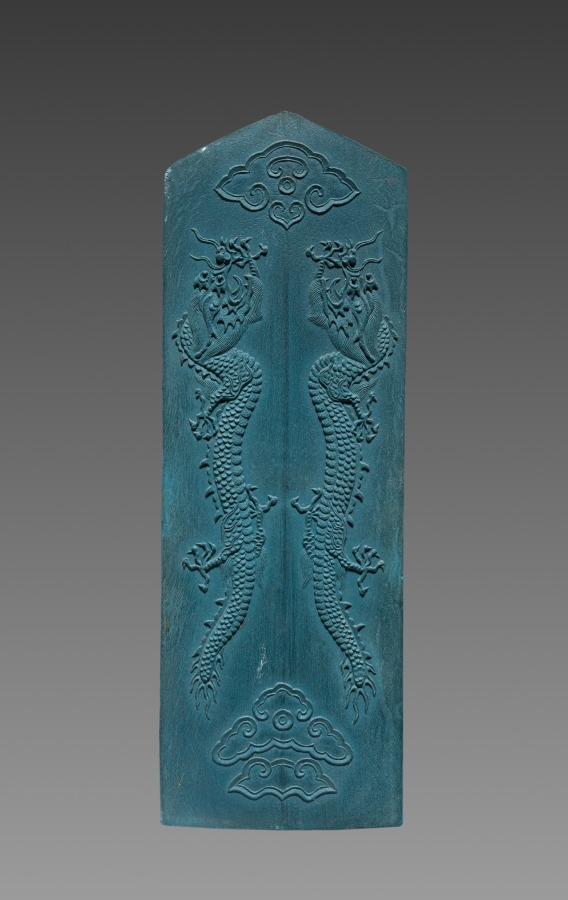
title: Box with Ink Cakes: Blue Ink Cake in Shape of a Gui Scepter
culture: China, Qing dynasty (1644-1911), Jiaqing reign (1795-1820)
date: 1795–1820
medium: Molded ink in blue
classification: Miscellaneous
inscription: 江西巡撫臣陳淮恭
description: Ink cakes (also called ink sticks) are dissolved with the addition of water and then ground on the surface of a flat square stone into liquid ink for painting and calligraphy. The precious ink cakes here, however, have never been used. The inscription on the side of the blue ink cake says that the set was commissioned by Chen Huai, Governor of Jiangxi Province.